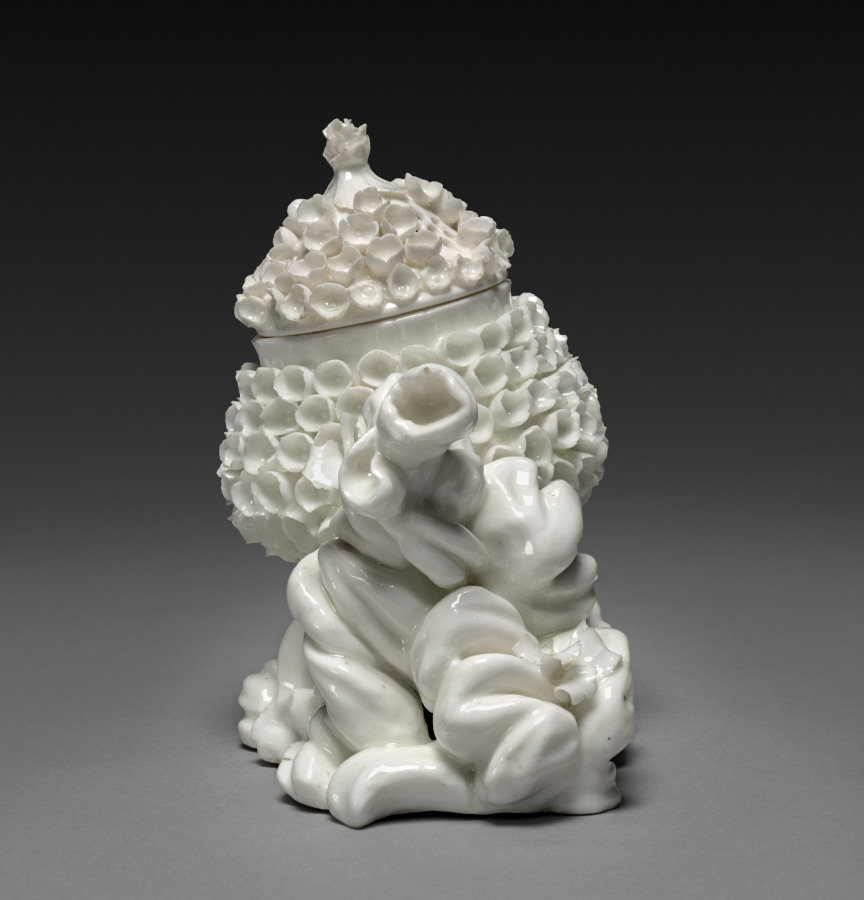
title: Potpourri Vase with Cover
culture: France, Vincennes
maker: Mennecy Factory (French)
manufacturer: Vincennes Porcelain Factory (France, 1740–56)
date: c. 1750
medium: soft-paste porcelain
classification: Ceramic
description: The delicate flowers that cover the lid and base of this vase draw inspiration from the schneeballblüten, or guelder rose, pattern produced at the German Meissen porcelain factory. The flowers on the lid are spaced by small, unobtrusive perforations that allow the scent of the potpourri, a mixture of flowers, herbs, and spices placed inside this vase, to disperse.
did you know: This style of potpourri vase, a pot atop a rockwork base, was popularly produced by major 18th-century porcelain factories including those at Vincennes, Chantilly, and Saint-Cloud.